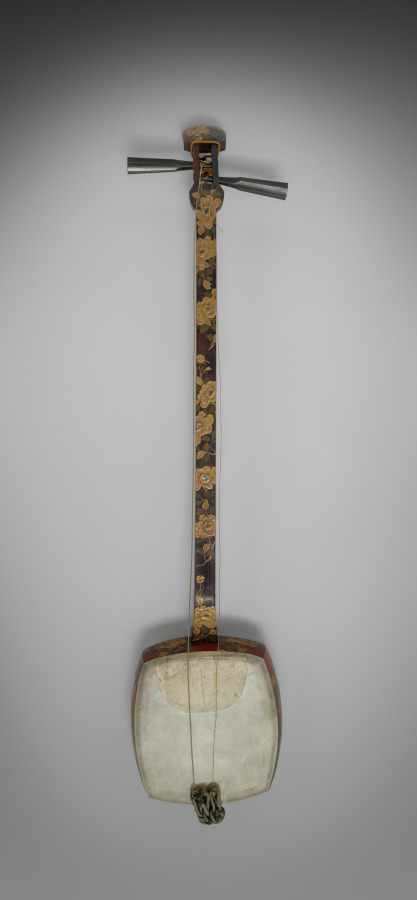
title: Guitar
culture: Japan, Edo period (1615–1868)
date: early to mid-1800s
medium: mixed media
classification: Musical Instrument